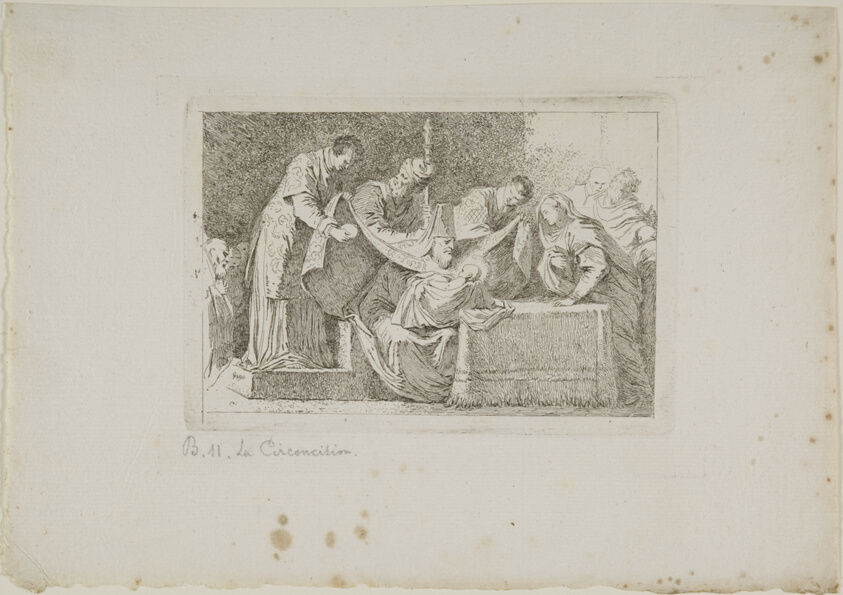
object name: Print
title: Circumcision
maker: Jean-Honoré Fragonard (French, 1732-1806); after Jacopo Robusti, called Tintoretto (Italian, 1519-1594)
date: 1763/64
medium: Etching on off-white laid paper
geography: France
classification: prints and drawing; etching; print